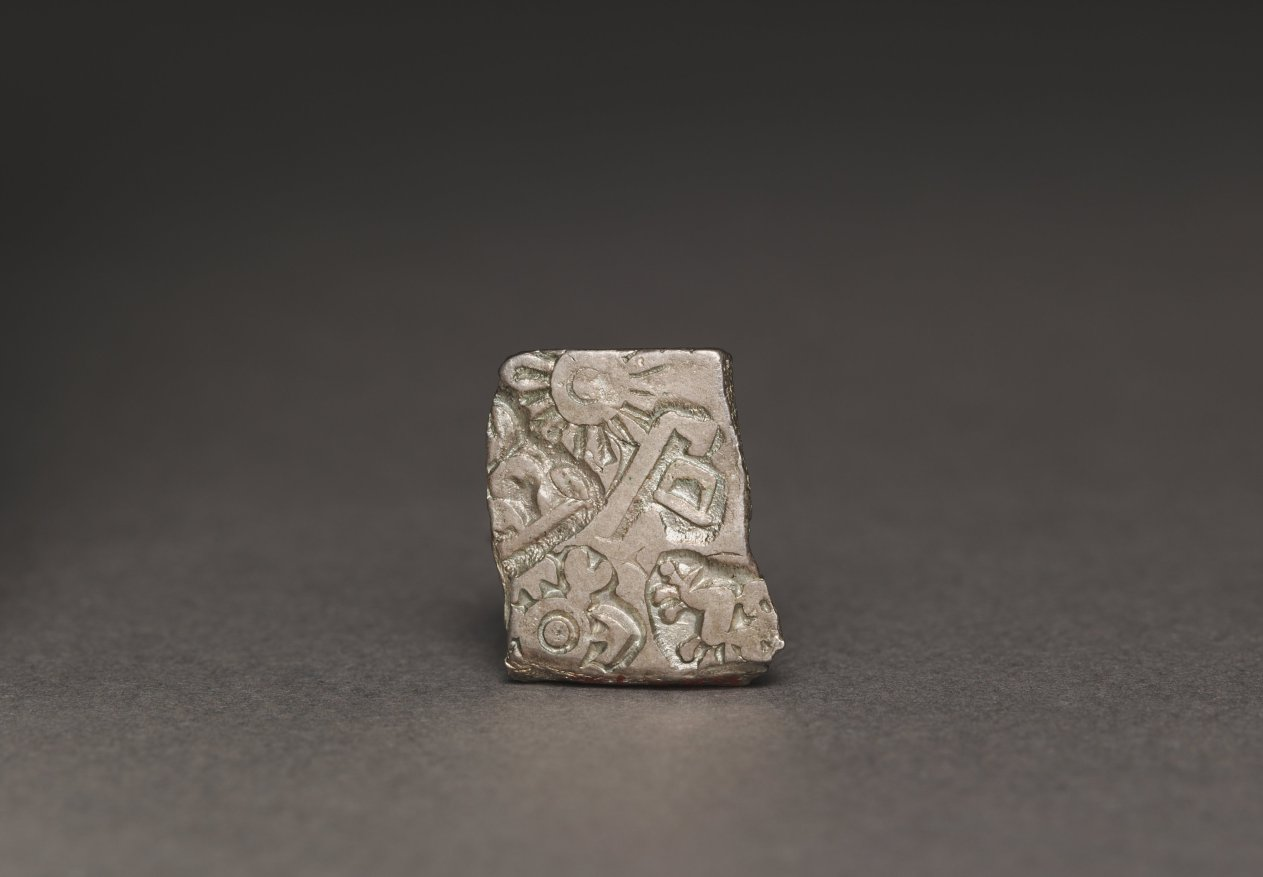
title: Punch-Marked Coin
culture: India, Rajasthan, Maurya period (322–185 BCE)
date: 400–300 BCE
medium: silver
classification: Coins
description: Indigenous Indian coinage was cut to weight from sheets of silver or copper and punch-marked, instead of die-cast. Each punch-marked coin had a unique combination of symbols.